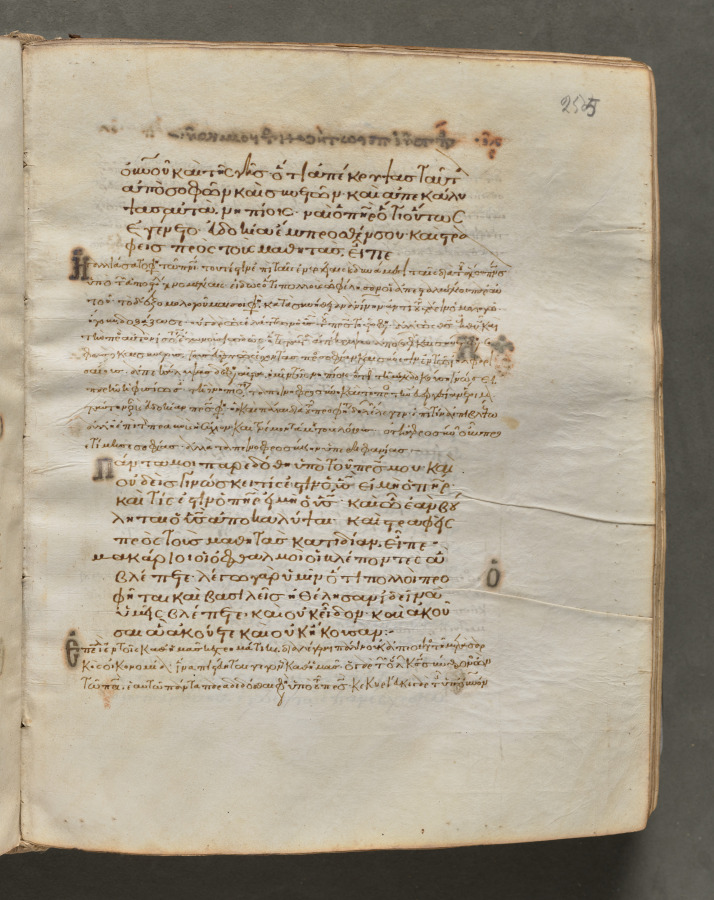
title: Text, folio 255 (recto), from a Gospel Book with Commentaries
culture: Byzantium, Constantinople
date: c. 1000–1100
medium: ink, tempera, and gold on vellum; leather binding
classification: Bound Volume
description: Each of the four gospels in this book opens on a page with brilliantly illuminated borders depicting the author of the text as well as birds—principally peacocks, symbols of the immortality of the soul—and fountains, representing the fountain of life and the salvation of the soul. This volume consists of 428 leaves with texts in Greek. Its level of sophistication suggests that it was probably written and decorated in a monastery in Constantinople.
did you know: Gospel books were carried in procession through Byzantine churches.